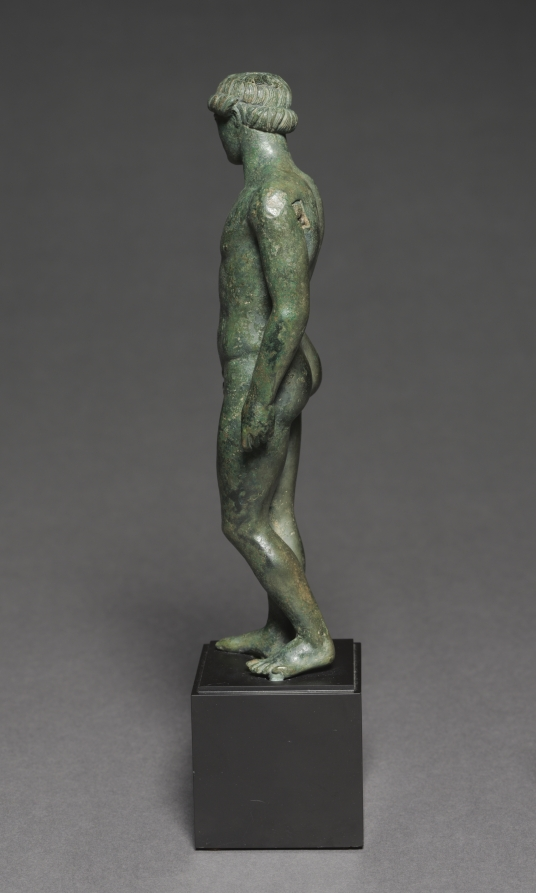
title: Athlete Making an Offering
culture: Greece, probably from workshop of Locri or Tarentum, Classical Period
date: c. 450–425 BCE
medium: bronze (hollow cast)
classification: Sculpture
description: Standing in a classic contrapposto pose, with one leg straight and weight-bearing, the other bent and relaxed, this athlete pauses after victory. He turns his head gently, looking down to make an offering with his lost right hand. At the sites of their victories and in their home cities, champion athletes were often honored with such sculptures, glorifying the strength and beauty of the male form at both small and large scale.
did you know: The missing right arm and hand of this athlete were cast separately and attached.